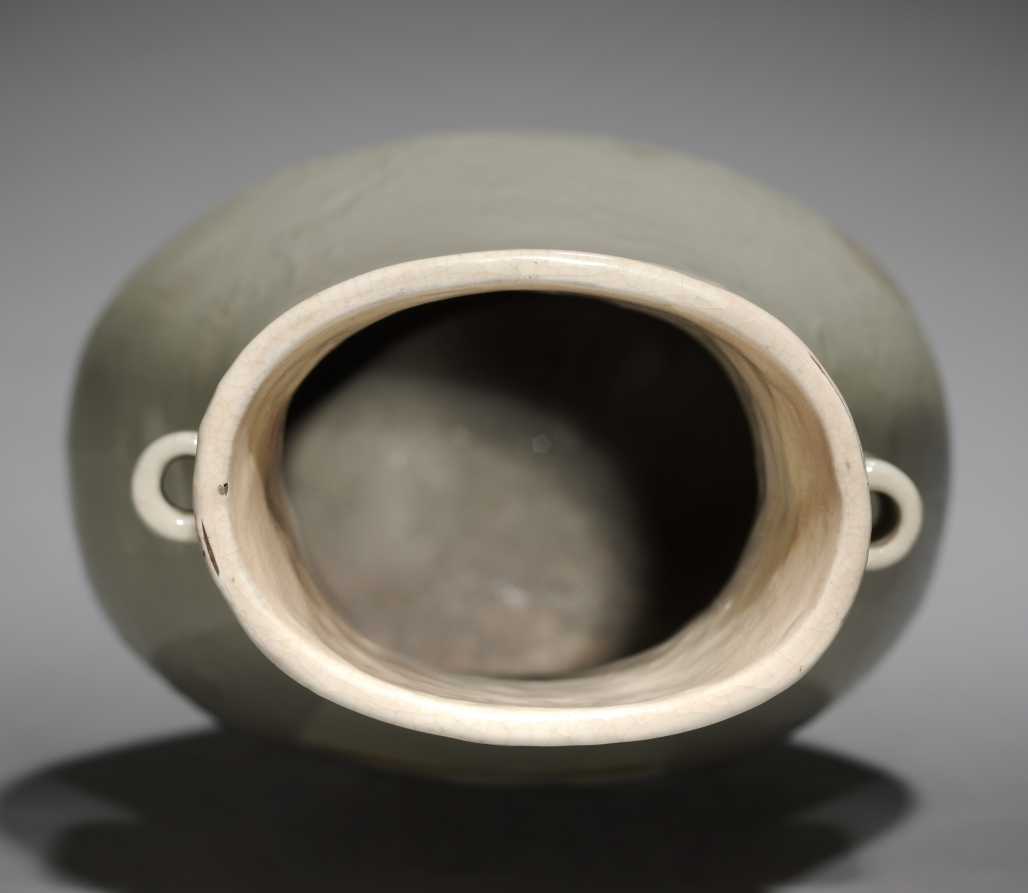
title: Vase: Ding ware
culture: China, Ming dynasty (1368–1644)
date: 1368–1644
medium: porcelain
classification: Ceramic